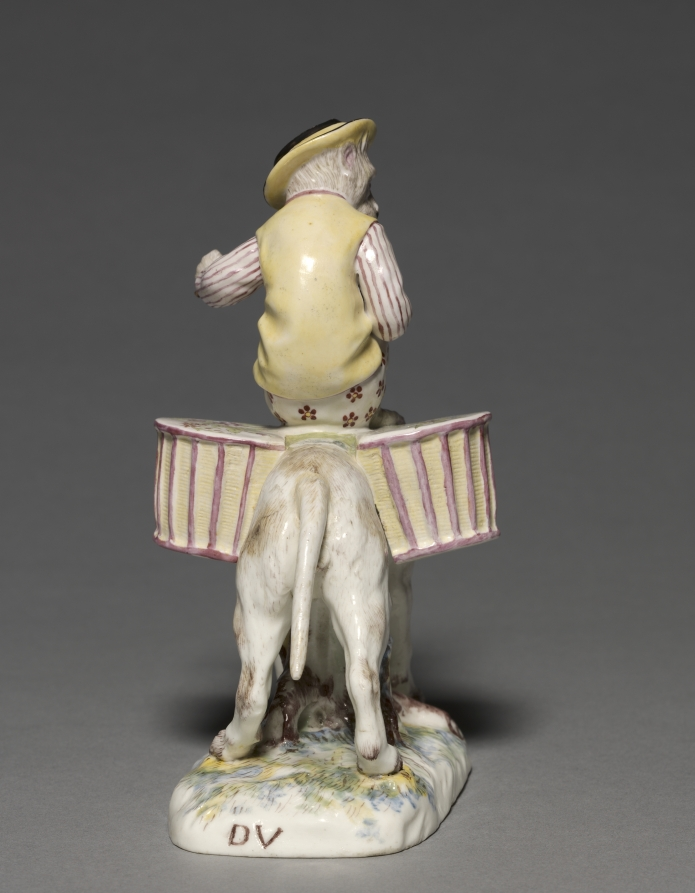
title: Figure of a Monkey on a Dog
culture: France, Mennecy, 18th century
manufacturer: Villeroy Factory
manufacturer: Mennecy- Villeroy Factory (French)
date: c. 1745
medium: soft-paste porcelain with enamel decoration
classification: Ceramic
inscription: [Incised on back of base, filled with manganese (brown)]: D.V.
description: Images of this type, monkeys dressed in human clothing and engaged in human pursuits, were called singeries and were represented in 18th-century French painting and decorative art. This particular figurine was based on a book of engravings that provided designs for contemporary craftsmen and was published by animal painter Christopher Huet in 1748.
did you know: This monkey may have once held a stick in its outstretched left hand.